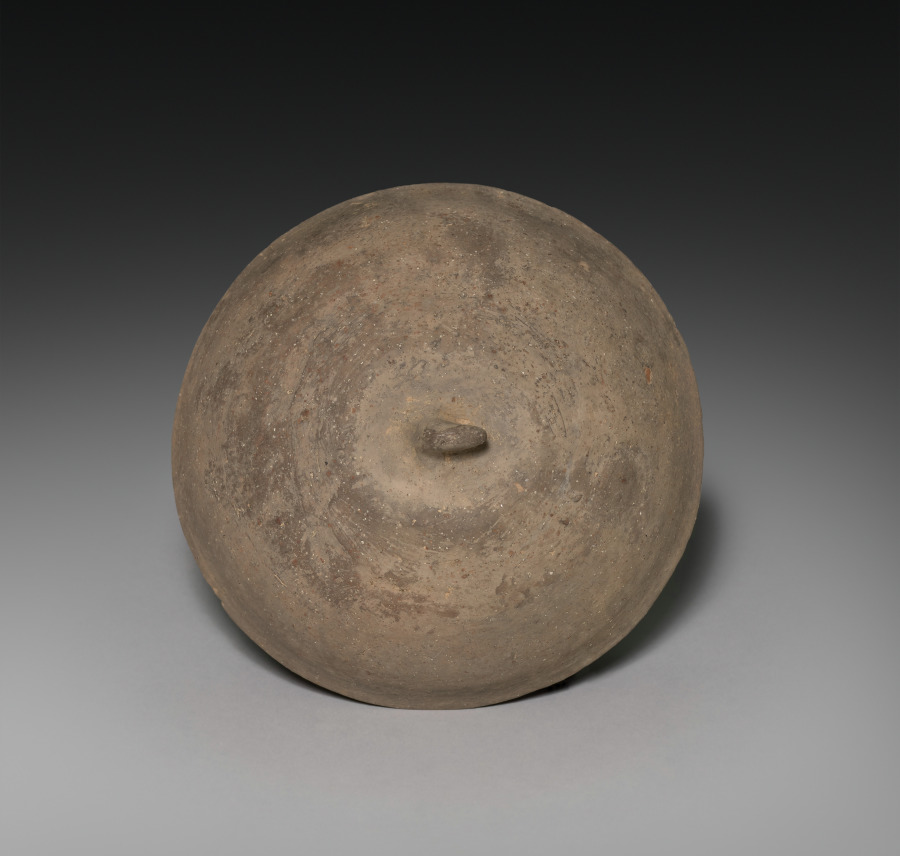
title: Lidded Jar with Four Horn Lugs (lid)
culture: Korea, Gaya period (42–562 CE)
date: 200s–400s CE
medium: earthenware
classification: Ceramic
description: Closed kilns built on hillsides became widely used for producing this type of pottery vessel in Korea during the Three Kingdoms period. Both its gray color and shimmering glaze are the result of the reduction of oxygen in the closed kiln chamber built on hillsides.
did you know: This pottery vessel served to contain cremated remains, indicating the popularity of Buddhist mortuary practice in Korea during the Three Kingdoms period.